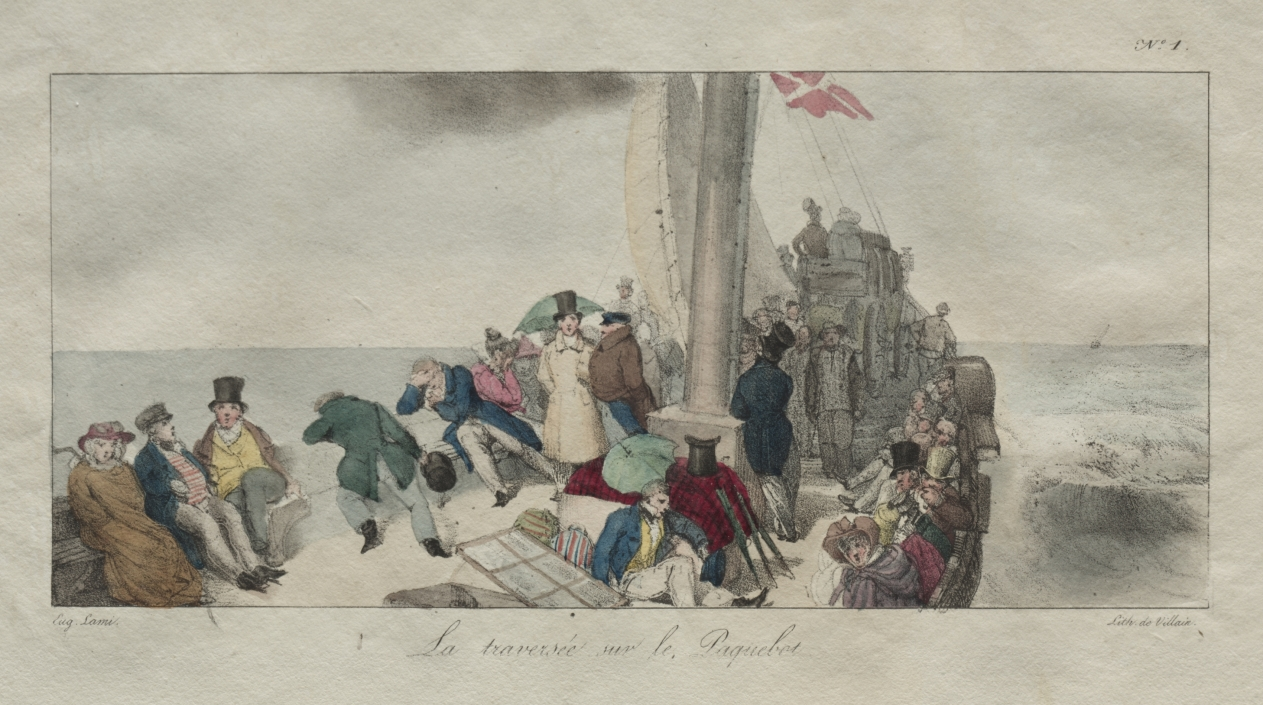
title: Souvenirs of London: Crossing on the Packet Boat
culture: France, 19th century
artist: Eugène Louis Lami (French, 1800–1890)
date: 1826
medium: lithograph, hand colored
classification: Print